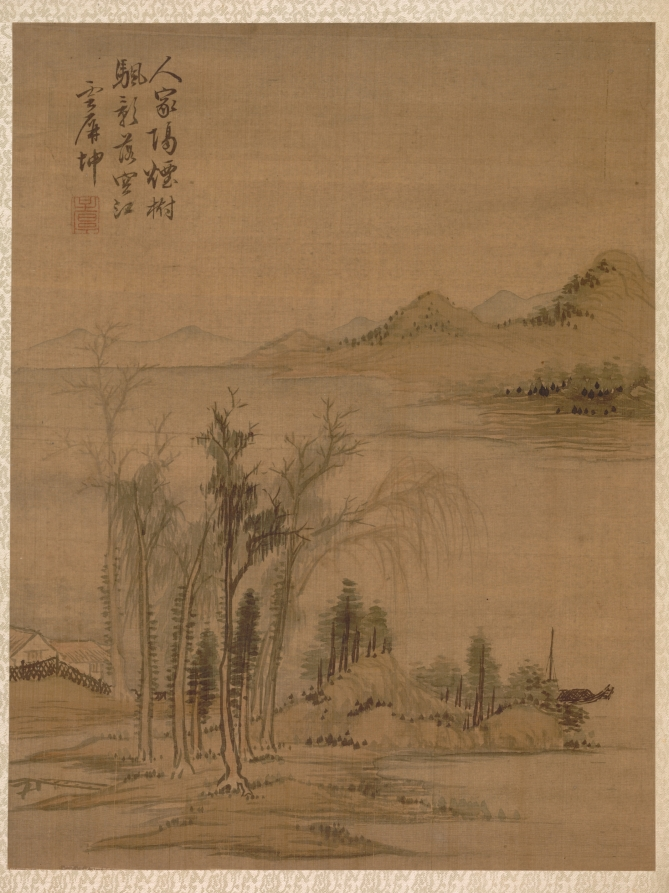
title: Landscape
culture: China, Qing dynasty (1644-1911)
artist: Zhai Dakun (Chinese, d. 1804)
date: 1775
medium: album leaf; ink and color on silk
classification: Painting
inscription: Spit of Misty Trees. A human dwelling on a spit of misty trees, Shimmering reflections fall on the empty river. Yunping Kun. Seal: r/r "Zihou"